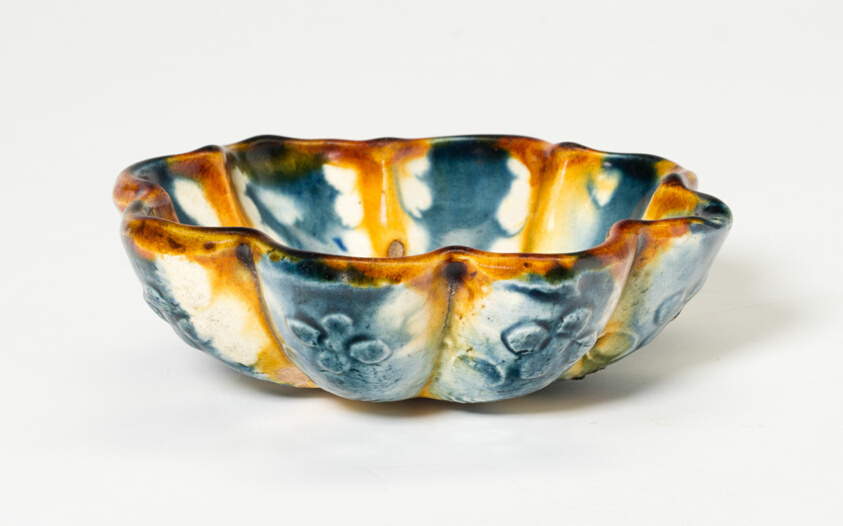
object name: Vessel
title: Lobed Bowl with Stylized Florets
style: Chinese (culture or style)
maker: China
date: Tang dynasty (618–906), first half of 8th century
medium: Earthenware with three color (sancai) lead glazes and underglaze molded decoration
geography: China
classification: bowl; dish (vessel); ceramics; vessel